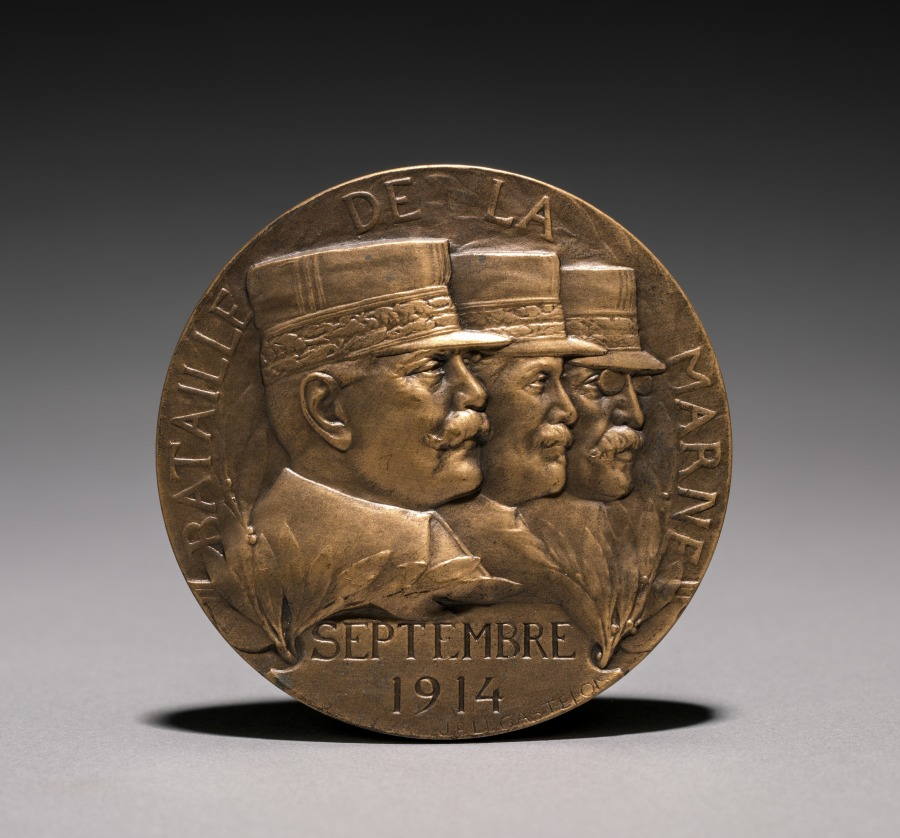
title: Medal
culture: France, 20th century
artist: Jules Prosper Legastelois (French, 1855–1931)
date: 1914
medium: bronze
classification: Metalwork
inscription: Bataille de la Marne September, 1914.